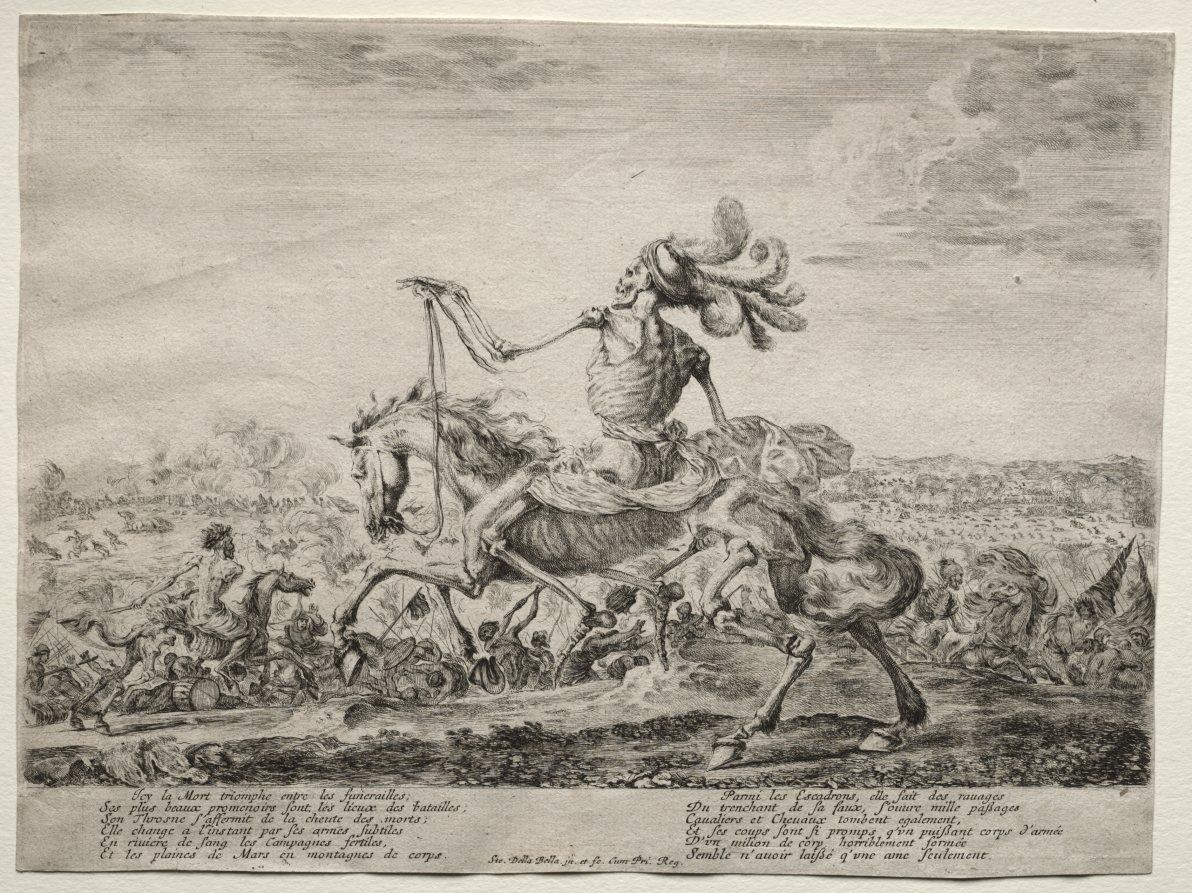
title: Death on the Battlefield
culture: Italy, 17th century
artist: Stefano Della Bella (Italian, 1610–1664)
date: 1646–1647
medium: etching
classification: Print